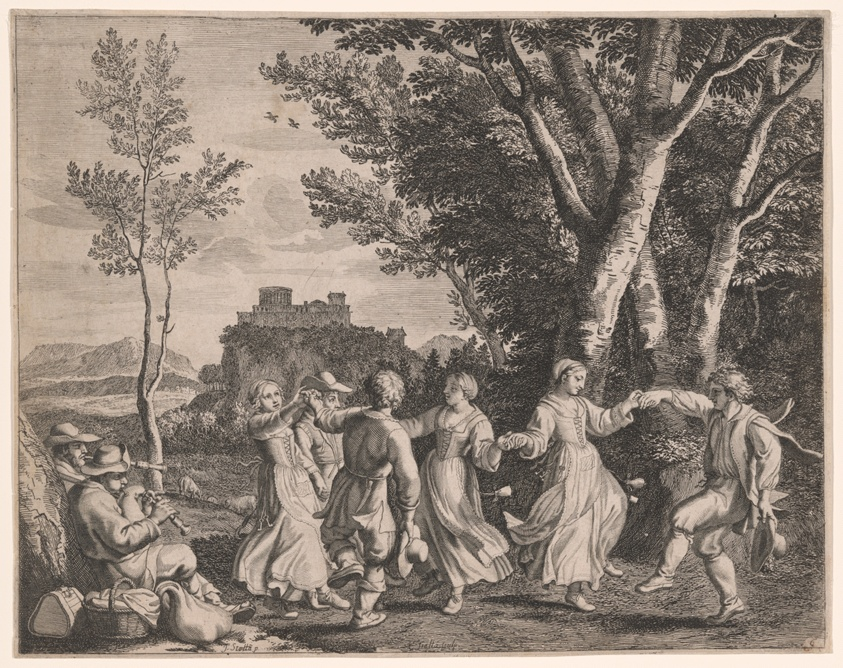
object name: Print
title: The Dance, Plate 6 from Pastorales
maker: Claudine Bouzonnet-Stella (French, 1636–1697); after Jacques Stella (French, 1596-1657)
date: 1667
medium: Etching in black on cream laid paper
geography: France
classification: prints and drawing; paper; etching; print